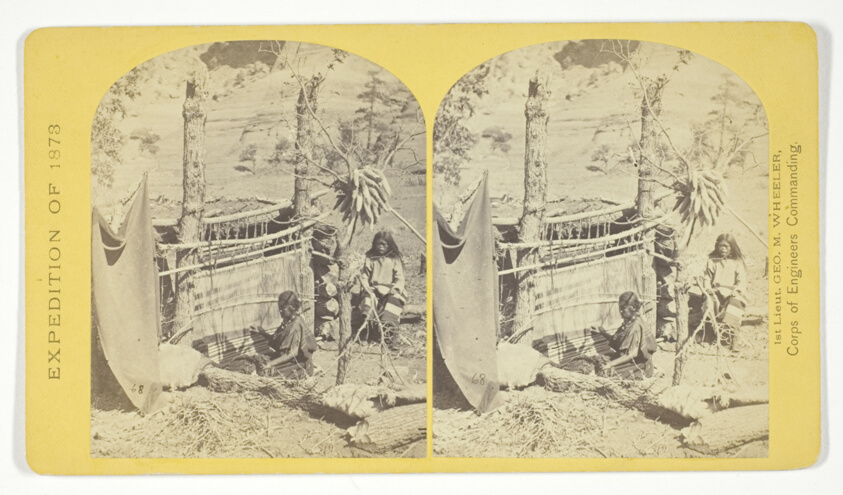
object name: Photograph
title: Aboriginal life among the Navajo Indians, Cañon de Chelle, New Mexico. Squaw weaving blankets. The native loom. The blankets made are of the best quality, and impervious to water, No. 26 from the series "Geographical Explorations and Surveys West of the 100th Meridian"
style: 19th century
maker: Timothy O'Sullivan (American, born Ireland, 1840–1882); commissioned by George Wheeler for the War Department, Corps of Engineers, U.S. Army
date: 1873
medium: Albumen print, stereo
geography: United States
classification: stereograph (albumen); photography; photograph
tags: Collected by Hugh Edwards, Geographical Explorations and Surveys